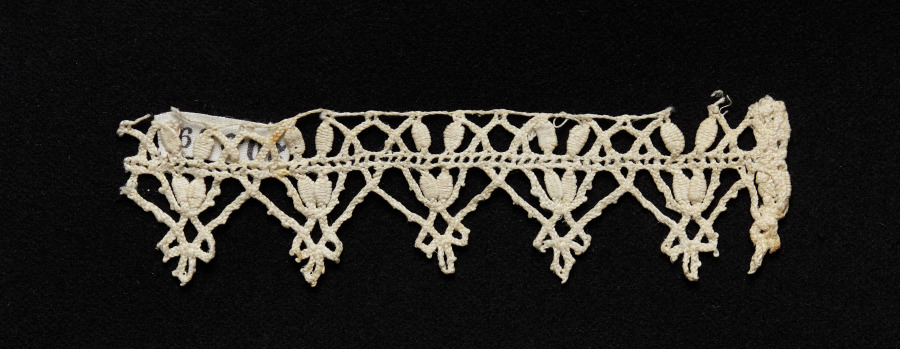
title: Lace Edging of Points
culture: Italy, Genoa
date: 1550–99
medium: Bobbin lace (needle lace, reticella or punto in aria design)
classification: Lace